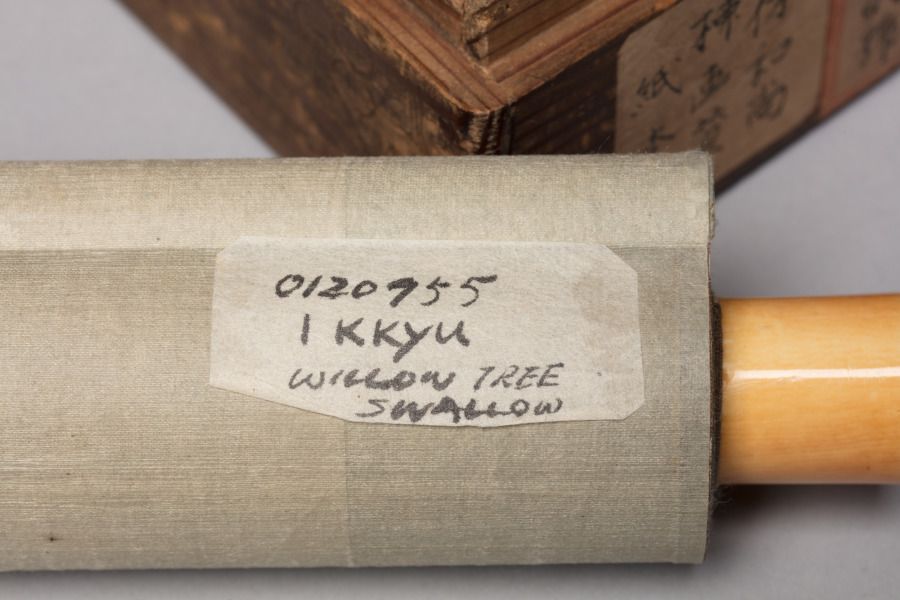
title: Calligraphy with Willow and Swallows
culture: Japan, Muromachi period (1392–1573)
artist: Ikkyū Sōjun (Japanese, 1394–1481)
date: 1400s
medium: hanging scroll, ink on paper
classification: Painting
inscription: How many days has it rid itself of the crow’s cloth? It knows not!/ Lovely is its body so nimble and neat./ Neither men of wealth, courtly position, or power can come close to the unfettered, noble swallow!/ With the coming of spring, it seems to be flying about, dancing around the grass hut of the foolish Priest. signed: Unkasō Isshi Tōkai jun Ikkyū shi ga ippitsu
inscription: outer box inscribed: Ikkyū Ōshō Enshi-zu Jigasan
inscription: inner box side lid inscribed: Showa 50 (1975), November by Tayama Honan with kao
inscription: Inner box side lid inscribed: Ikkyū Ōshō Bokuseki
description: The famed Buddhist monk Ikkyū is best remembered for his calligraphy. Calligraphic conventions of his time called for brushwork that did not vary much in style from character to character. However, as Ikkyū’s lines progress, his brushwork wanders between standard script and a sort of shorthand, marked by an uneven distribution of ink and a reduction of the characters to only the most necessary strokes. Ikkyū’s direct communication of emotion via brushwork became characteristic of the works produced by monks affiliated with the temple Daitokuji later in the Edo period (1615–1868).